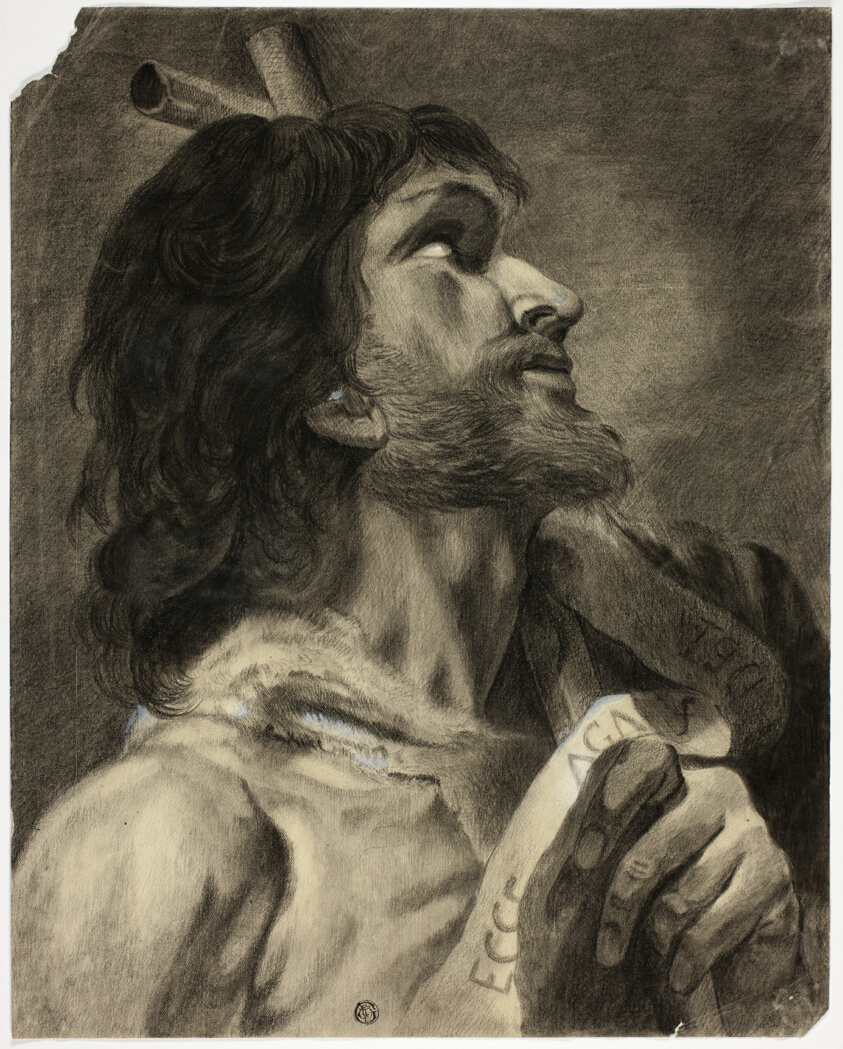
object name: Drawing and Watercolor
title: Saint John the Baptist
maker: After Giovanni Battista Piazzetta; Italian, 1682-1754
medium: Black chalk with stumping, heightened with white gouache, on cream wove paper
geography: Italy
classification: chalk; paper; drawings (visual works); prints and drawing